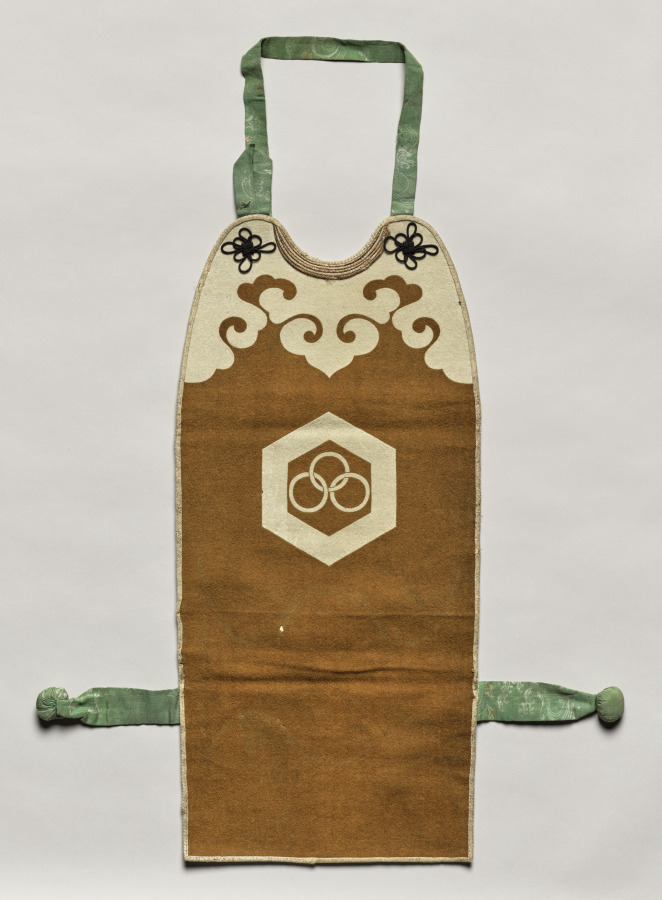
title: Plastron or Frontpiece for a Firefighter's Suit (Kaji shōzoku)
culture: Japan, Edo period (1615–1868)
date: late 1700s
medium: Wool (rasha); applique and silk and gold thread cord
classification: Textile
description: Wood architecture in densely populated areas made firefighting a frequent occurrence in the Edo period (1615–1868). Jackets made of leather or wool offered firefighters protection against the flames. Wool was imported from Europe. The triple ring crest in white is of the “three alternating rings” (mitsurin chigai) type framed in a tortoise shell (kikko) motif, and identified the house with which the wearer was affiliated.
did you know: Wool has self-extinguishing properties that protect the wearer from fire.